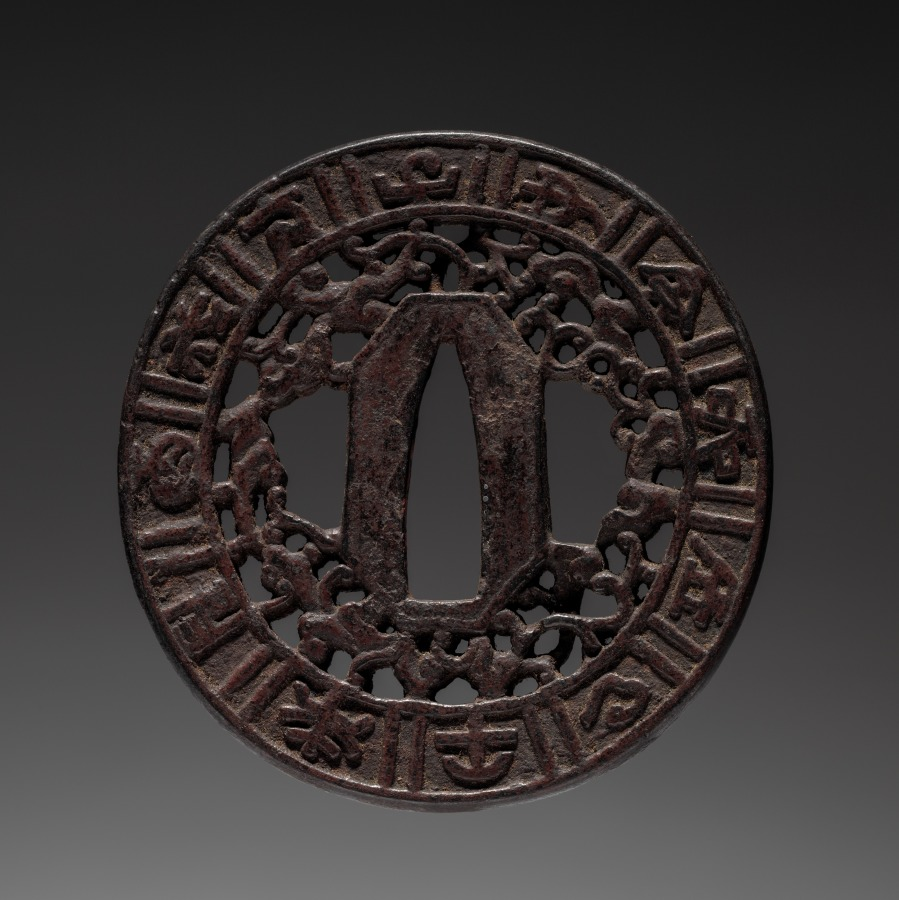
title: Sword Guard (Tsuba)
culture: Japan, possibly Edo period (1615-1868)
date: c. 1615–1868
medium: iron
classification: Arms and Armor